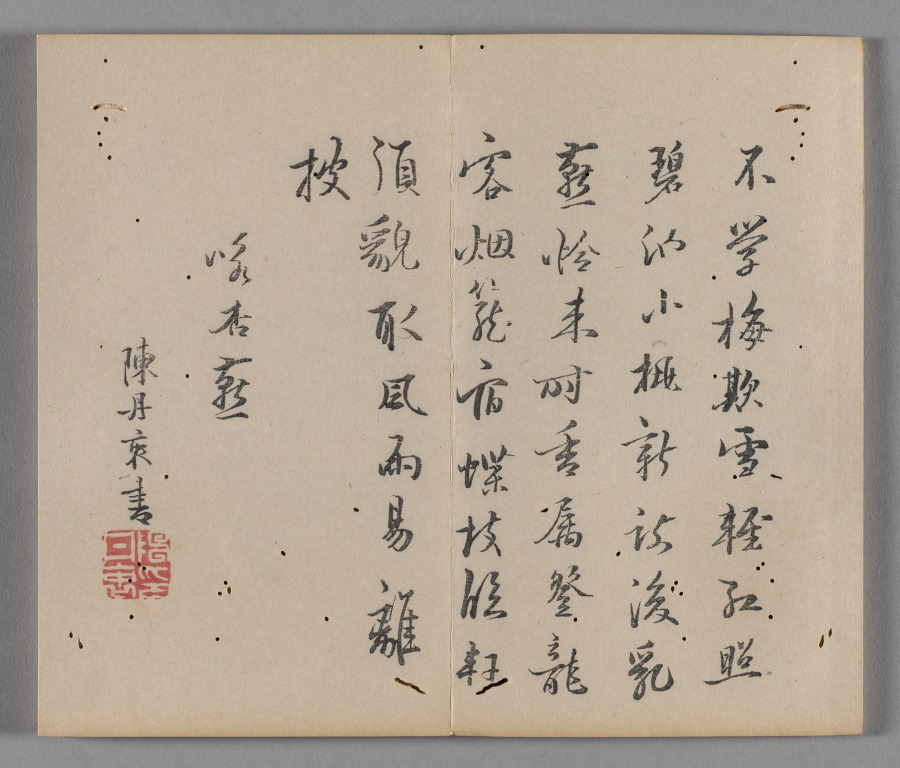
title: Ten Bamboo Studio Painting and Calligraphy Handbook (Shizhuzhai shuhua pu): Miscellaneous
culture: China, Qing dynasty (1644-1911)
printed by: Hu Zhengyan (Chinese, c. 1584–1674)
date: 1633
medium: Woodblock-printed book; ink and colors on paper; first edition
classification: Print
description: Color printing reached a level of perfection in the early 1600s, as seen in this Ten Bamboo Studio Collection of Calligraphy and Painting and the Mustard Seed Garden Manual of Painting (printed 1679 and 1701). The painterly quality, precision in registering (aligning) the woodblocks, and harmonious colors made them the most successful color print editions in Chinese history. Both editions were printed and compiled in Nanjing, spread nationwide, and had a great impact on the arts in Japan and Korea.